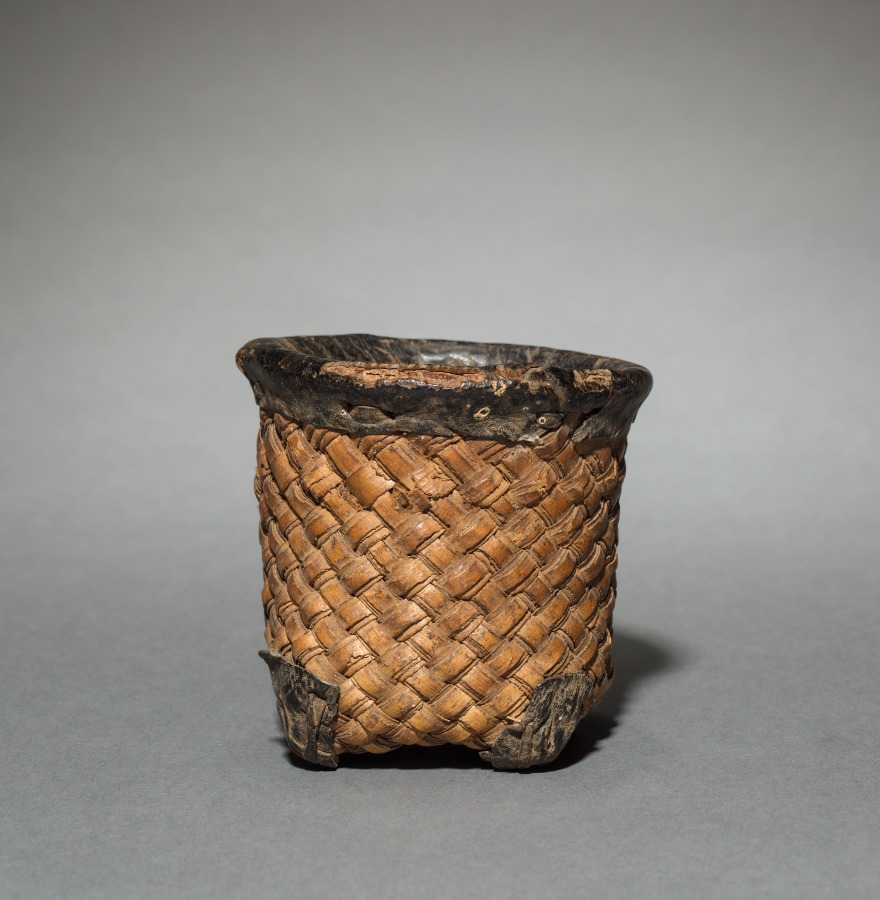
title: One of Ten Nesting Wedding Baskets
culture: Africa, Western Africa, Burkina Faso, Lobi–style maker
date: c 1900s?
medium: Plant fiber and leather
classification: Vessels